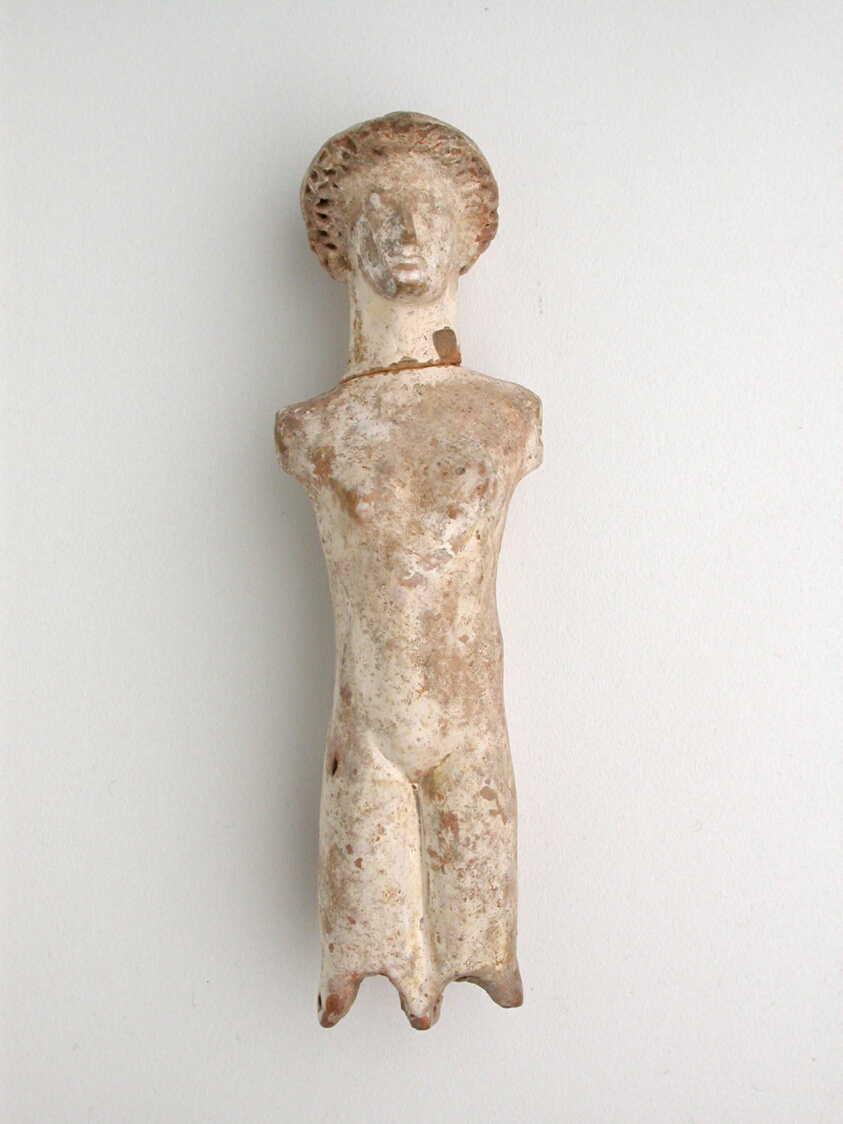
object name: Sculpture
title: Torso From a Doll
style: greek, ancient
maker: Greek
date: late 5th-4th century BCE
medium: terracotta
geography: Tanágra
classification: sculpture; earthenware; ceramics; ancient art